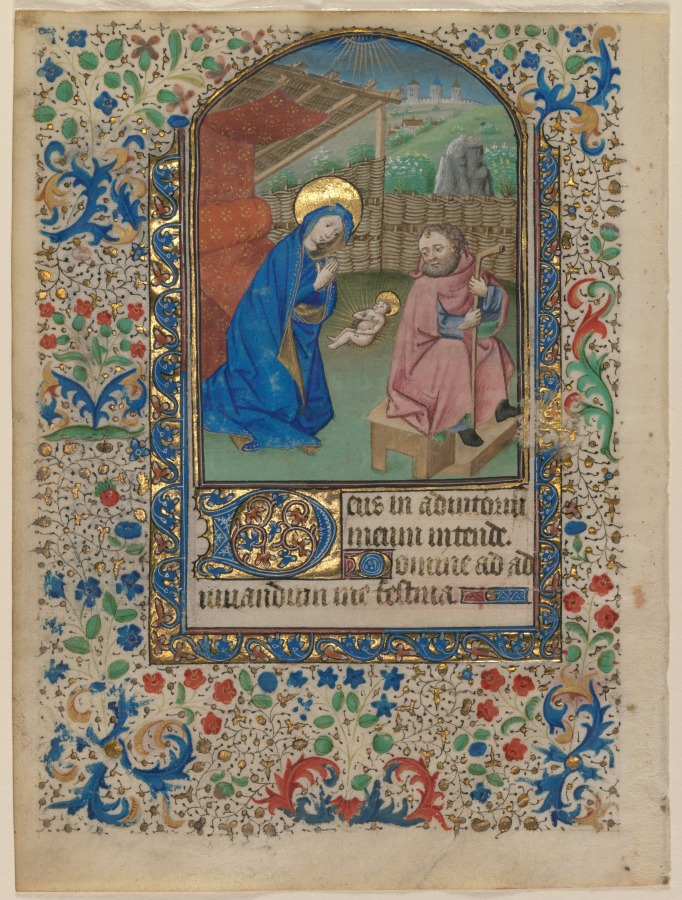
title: Leaf from a Book of Hours: The Nativity (recto)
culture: Northeastern France, 15th century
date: c. 1430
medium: ink, tempera and gold on vellum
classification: Manuscript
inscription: Deus in adiutorium meum intende. Domine, ad adiuvandum me festina.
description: Representing God's entry into the world, the Nativity remains one of medieval painting's most poignant Christian images. In the Gospels, only Matthew and Luke directly described this event. Perhaps the brevity and absence of detail in these texts allowed artists to devote so much creativity to amplifying the Christmas story. This miniature's simplicity makes it compelling. Only the three principals—Mary, Joseph, and the newly born Christ Child—appear in the scene. The Virgin kneels before an elegant canopied bed made sumptuous by a richly embroidered textile, which stands in contrast to the nearby rustic fence and receding landscape. This scene probably follows the mystical visions of Saint Bridget of Sweden who visited Bethlehem in 1370, and whose written accounts circulated widely after her canonization in 1391: "When her time came she took off her shoes and her white cloak and undid her veil. . . . Then she made ready the swaddling clothes which she put down beside her. When all was ready she bent her knees and began to pray. While she was thus praying with hands raised the child was suddenly born, surrounded by a light so bright that it completely eclipsed Joseph's feeble candle."